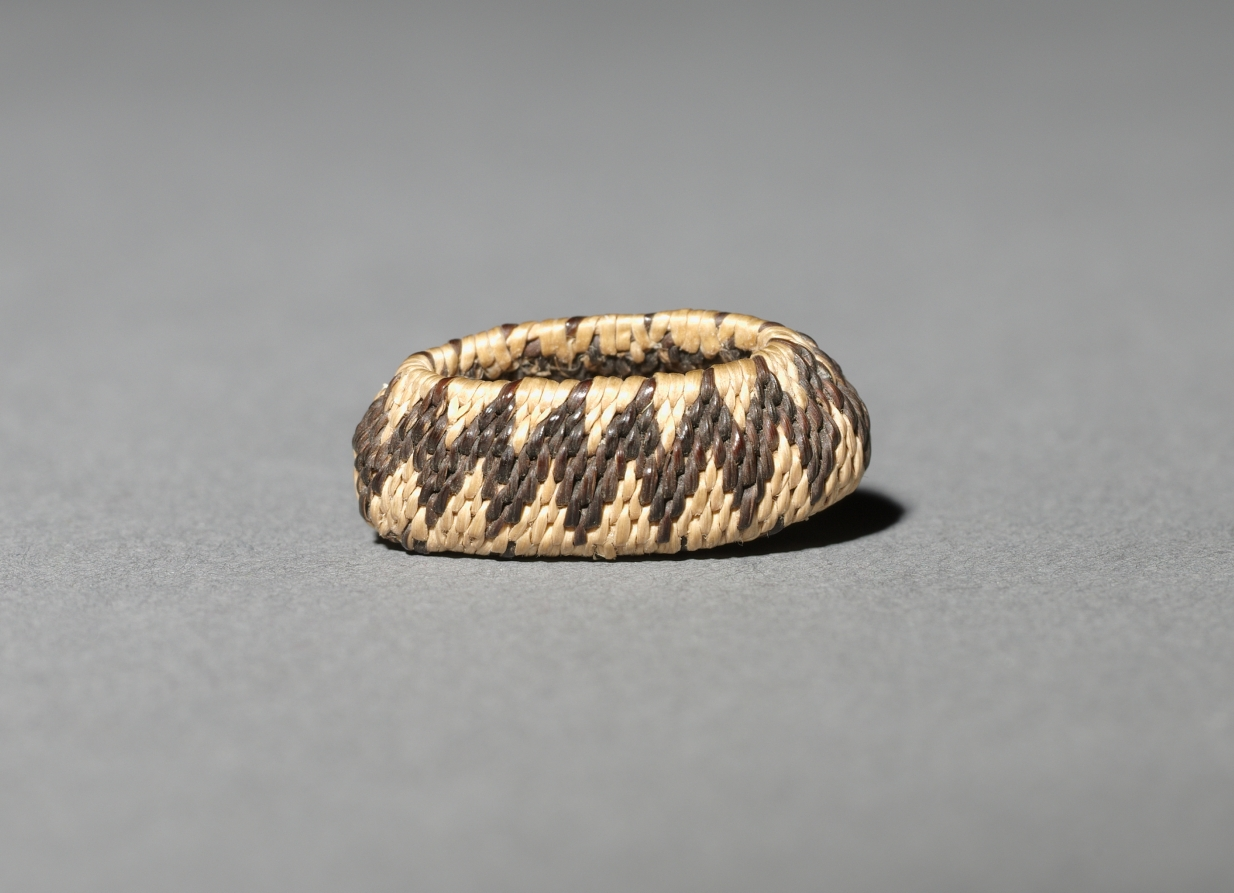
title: Miniature Rhomboidal Basket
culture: California, Pomo, late 19th-early 20th century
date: late 1800s-early 1900s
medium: plant materials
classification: Basketry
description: Miniature baskets were made to demonstrate the basket-maker’s virtuoso skill, and these tiny marvels seem to be no exception—the smallest are just a few millimeters wide but still patterned. For such fine work, dexterity was required as much for preparation of materials as for weaving.